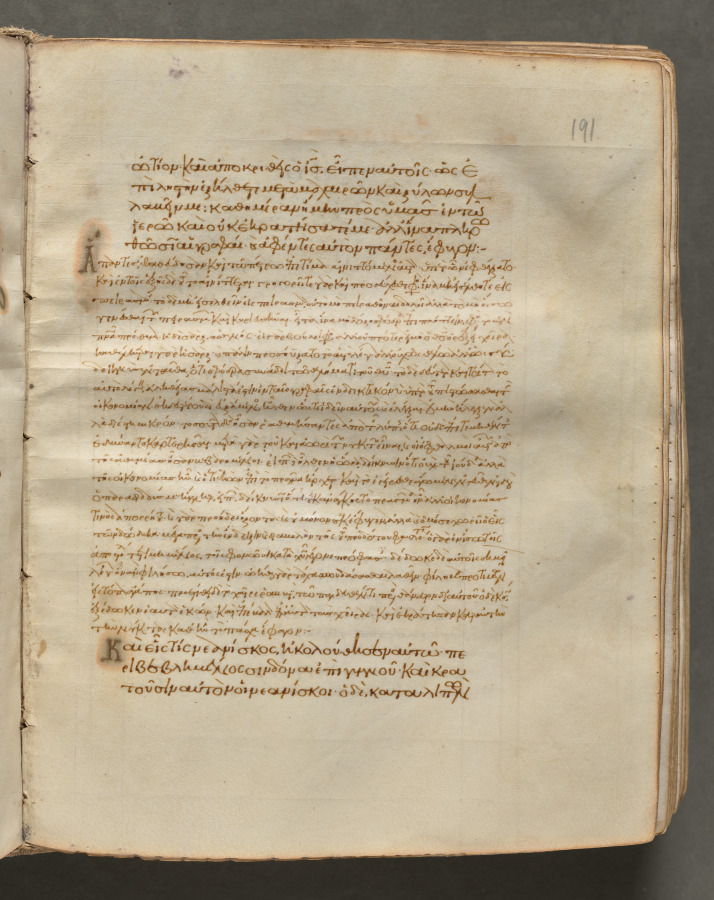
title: Text, folio 191 (recto), from a Gospel Book with Commentaries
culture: Byzantium, Constantinople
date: c. 1000–1100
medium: ink, tempera, and gold on vellum; leather binding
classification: Bound Volume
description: Each of the four gospels in this book opens on a page with brilliantly illuminated borders depicting the author of the text as well as birds-principally peacocks, symbols of the immortality of the soul-and fountains, representing the fountain of life and the salvation of the soul. This volume consists of 428 leaves with texts in Greek. Its level of sophistication suggests that it was probably written and decorated in a monastery in Constantinople.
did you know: Gospel Books were carried in procession through Byzantine churches.